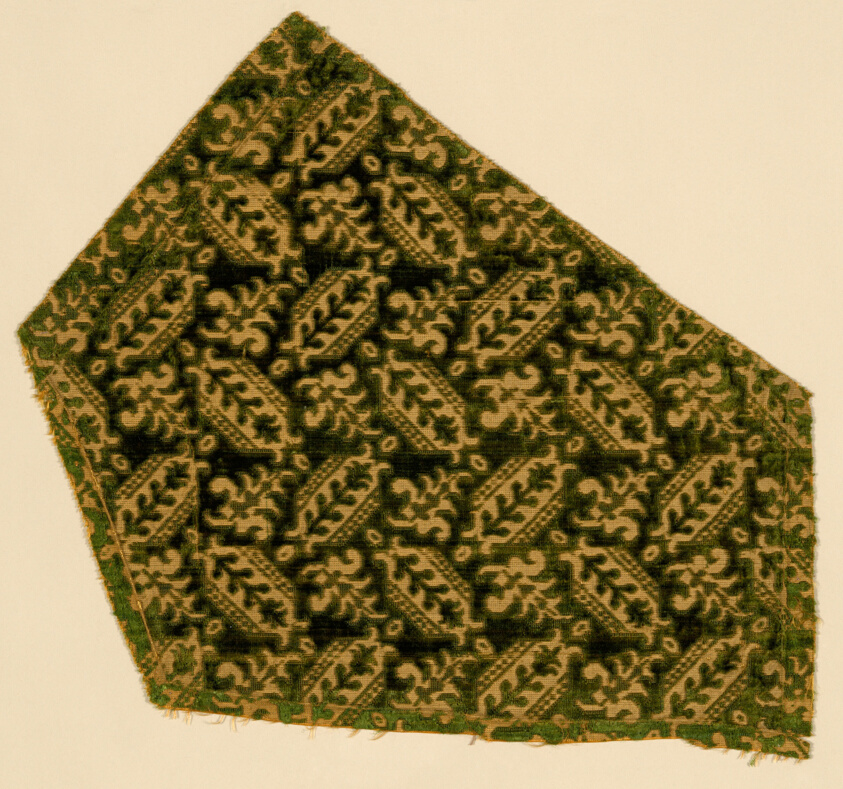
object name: Textile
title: Fragment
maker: Italy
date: 1601/35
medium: Silk, plain weave with supplementary pile warps forming cut, uncut, and voided velvet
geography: Italy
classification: textile; weaving - velvet; weaving